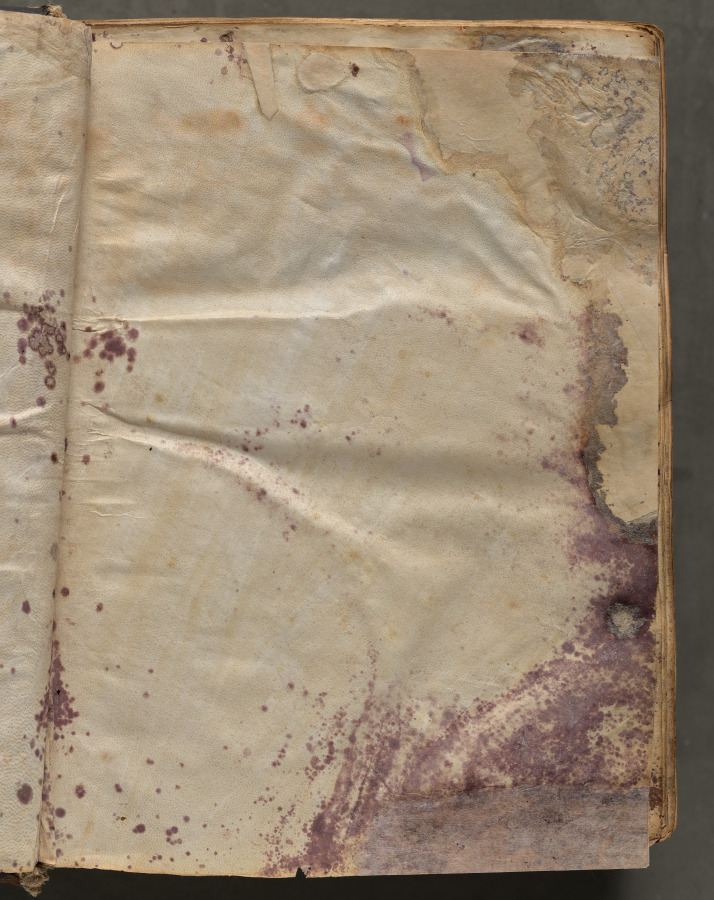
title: Text, folio 5 (recto), from a Gospel Book with Commentaries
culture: Byzantium, Constantinople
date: c. 1000–1100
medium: ink, tempera, and gold on vellum; leather binding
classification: Bound Volume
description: Each of the four gospels in this book opens on a page with brilliantly illuminated borders depicting the author of the text as well as birds-principally peacocks, symbols of the immortality of the soul-and fountains, representing the fountain of life and the salvation of the soul. This volume consists of 428 leaves with texts in Greek. Its level of sophistication suggests that it was probably written and decorated in a monastery in Constantinople.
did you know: Gospel Books were carried in procession through Byzantine churches.